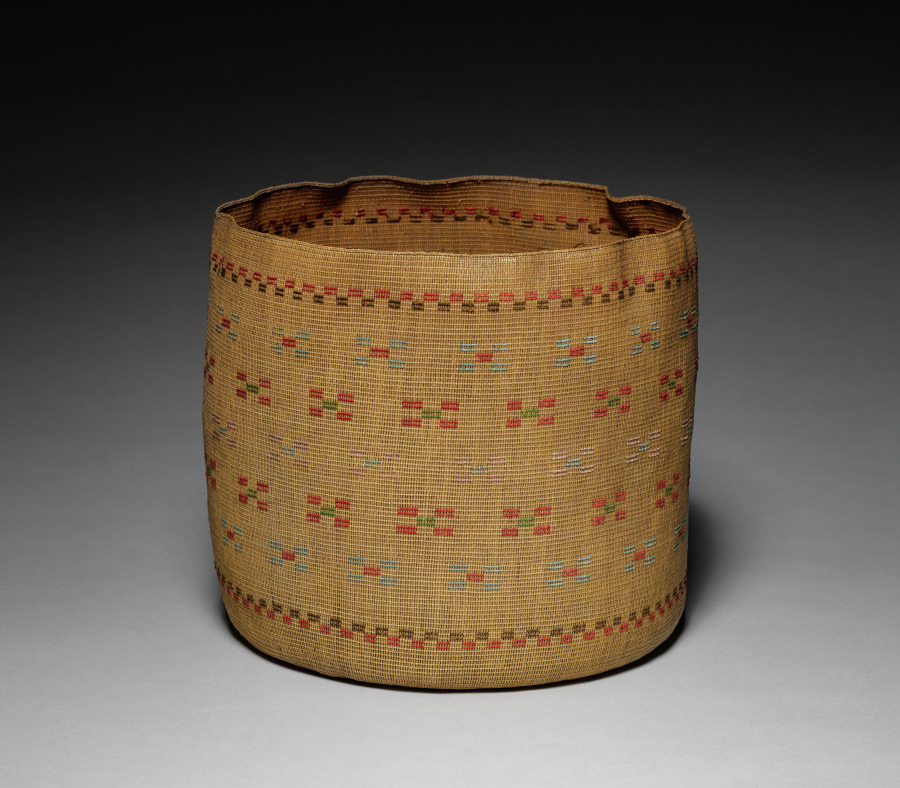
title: Twined Cylindrical Basket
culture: Arctic. Aleut (Attu), late 19th-early 20th century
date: 1890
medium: twined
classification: Basketry